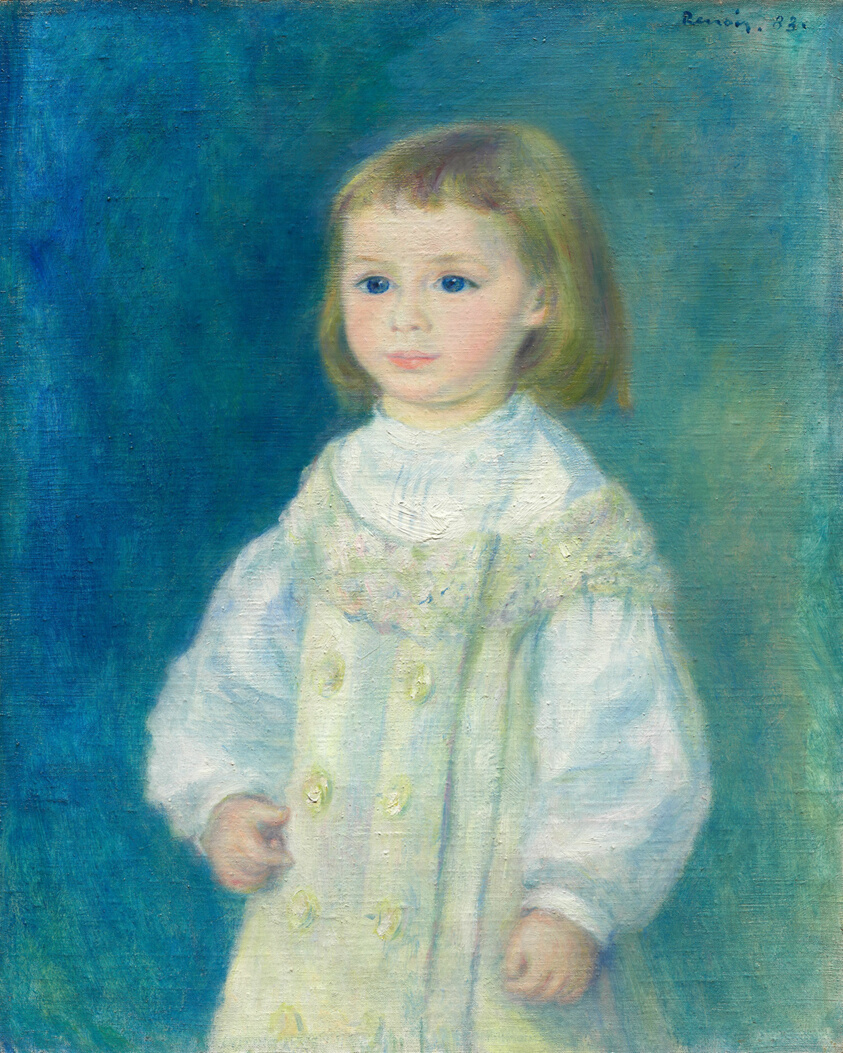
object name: Painting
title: Lucie Berard (Child in White)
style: Impressionism, nineteenth century, 19th century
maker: Pierre-Auguste Renoir (French, 1841–1919)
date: 1883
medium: Oil on canvas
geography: France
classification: painting; portrait; oil paintings (visual works); oil on canvas; french; paint; european painting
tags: portraits: child subject, white (color), portraits: female subject, portrait, green (color), girls, girl, dresses, blue (color), blue, portraits, children, Century of Progress, world's fairs, Chicago World's Fairs